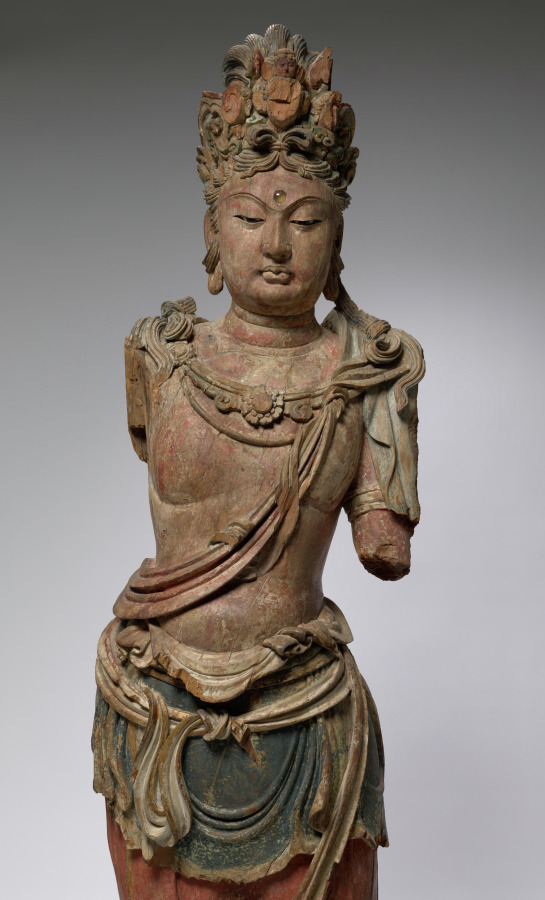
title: Eleven-Headed Guanyin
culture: China, late Northern Song dynasty (960-1127) - Jin dynasty (1115-1234)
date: 1100–1200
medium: wood with polychromy and cut gold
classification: Sculpture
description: The bodhisattva is an enlightened being dedicated to the spiritual awakening of all beings. The compassionate bodhisattva Guanyin, in a variety of manifestations, is probably the most popular deity of worship in Chinese Buddhism. In the Esoteric Buddhist form shown here, this standing Guanyin has a total of eleven heads, with smaller ones above the principal head. The uppermost head represents the Buddha Amitabha, to whom he is closely related. The eleven heads symbolize the Buddha’s steps on the path to enlightenment.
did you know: This Guanyin is carved from a single block of willow (genus Salix sp.).